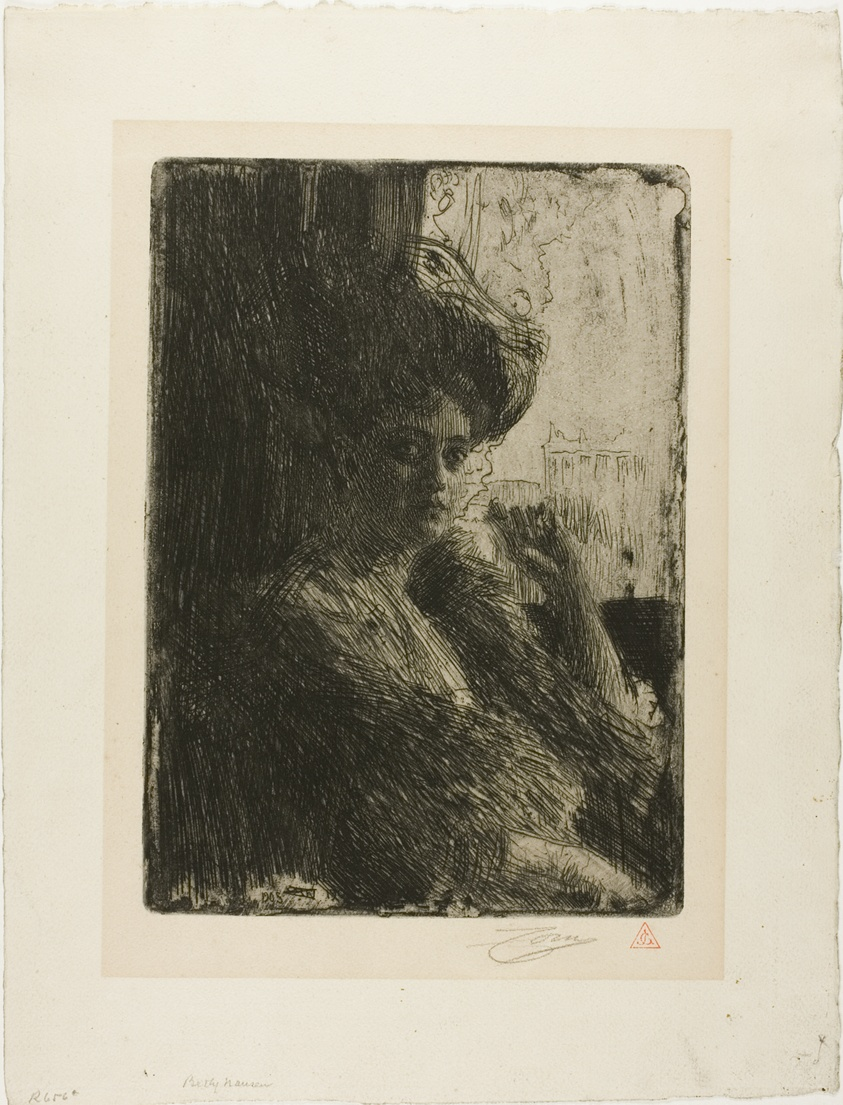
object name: Print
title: Betty Nansen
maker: Anders Zorn (Swedish, 1860-1920)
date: 1905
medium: Etching on ivory laid paper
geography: Sweden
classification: etching; print; prints and drawing